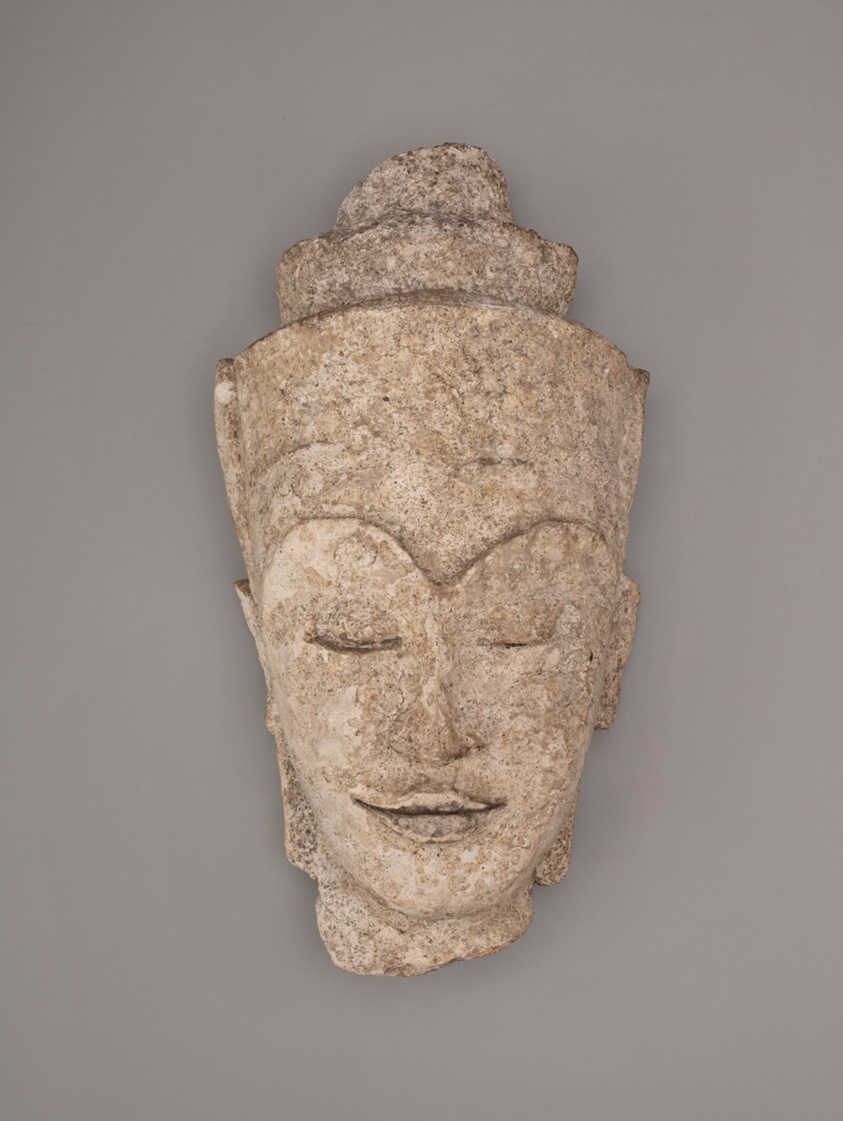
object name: Sculpture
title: Crowned Head of a Bodhisattva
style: Southeast Asian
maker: Thailand; Central Thailand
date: Ayutthaya period, late 17th century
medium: Stucco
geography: Thailand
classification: bust/head; stuccowork; sculpture; asian art